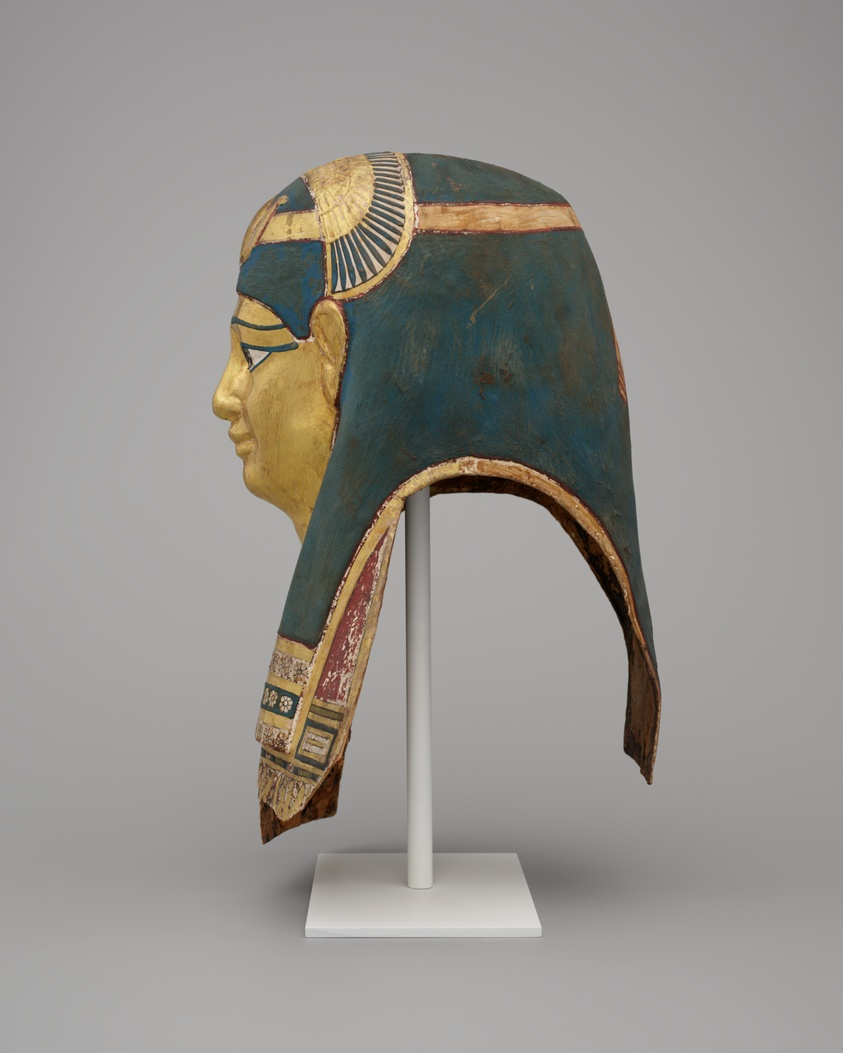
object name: Funerary Object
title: Funerary Mask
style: egyptian, ancient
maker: Egyptian; probably from Hawara, Egypt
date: Late Ptolemaic Period-early Roman Period, 1st century BCE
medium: Cartonnage, gold leaf, and pigment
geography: Egypt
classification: mummy goods; mummy masks; mummy portraits; ancient art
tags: masks